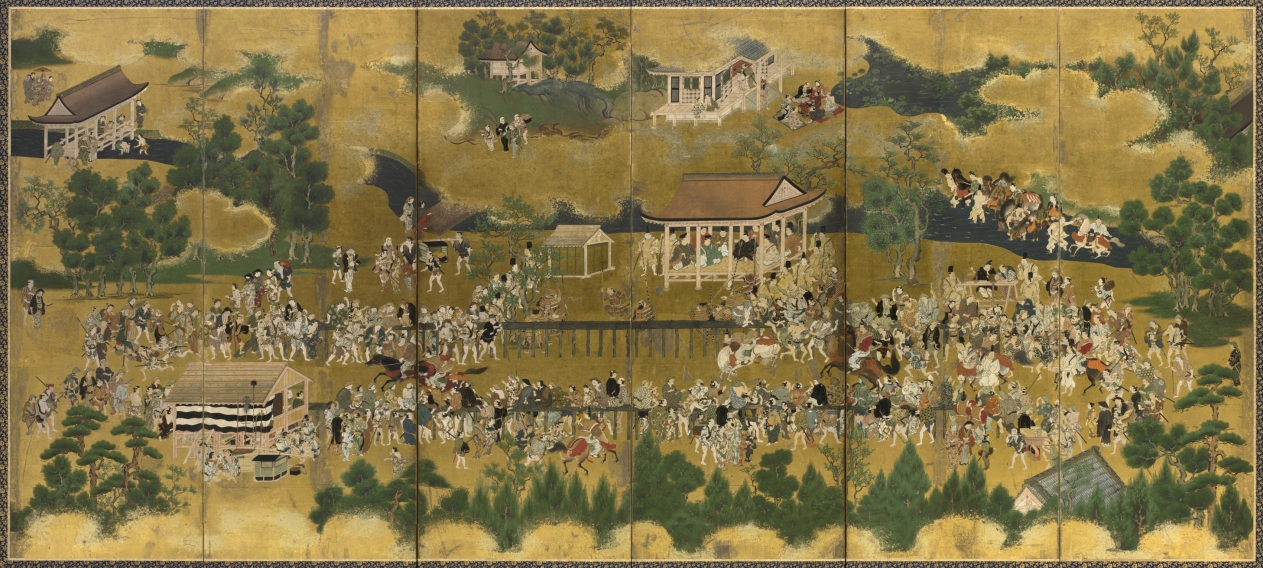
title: Horse Race at the Kamo Shrine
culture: Japan, Edo period (1615–1868)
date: early to mid-1600s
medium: One of a pair of six-panel folding screens; ink and color on gilded paper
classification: Painting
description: Kamo Shrine in Kyoto, seen in the upper half of the left screen, has held an annual horse race on May 5th since the ninth century. Serving as a snapshot of the festivities, this pair of screens captures nearly 600 people watching the race, beginning at the bottom part of the right screen and continuing to the left. The race is a great spectacle where aristocratic riders cling to their fast and unwieldy mounts. While many of those in attendance seem in rapt attention to the main event, other vignettes depict people engaged in an array of activities. This pair of screens was likely originally part of a group of linked murals.